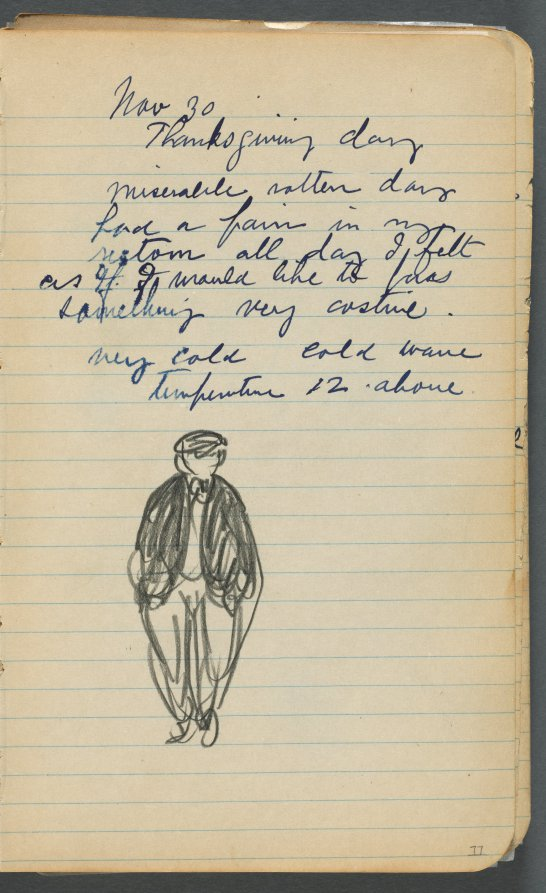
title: Sketchbook, page 011: Notes and a Male Figure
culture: America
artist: Maurice Prendergast (American, born Newfoundland [now Canada], 1858–1924)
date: 1905–10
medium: graphite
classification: Bound Volume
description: This sketchbook contains 69 pages of drawings, a diary largely devoted to the state of the artist's health, and a three-page discourse on the nature of genius and ideas.